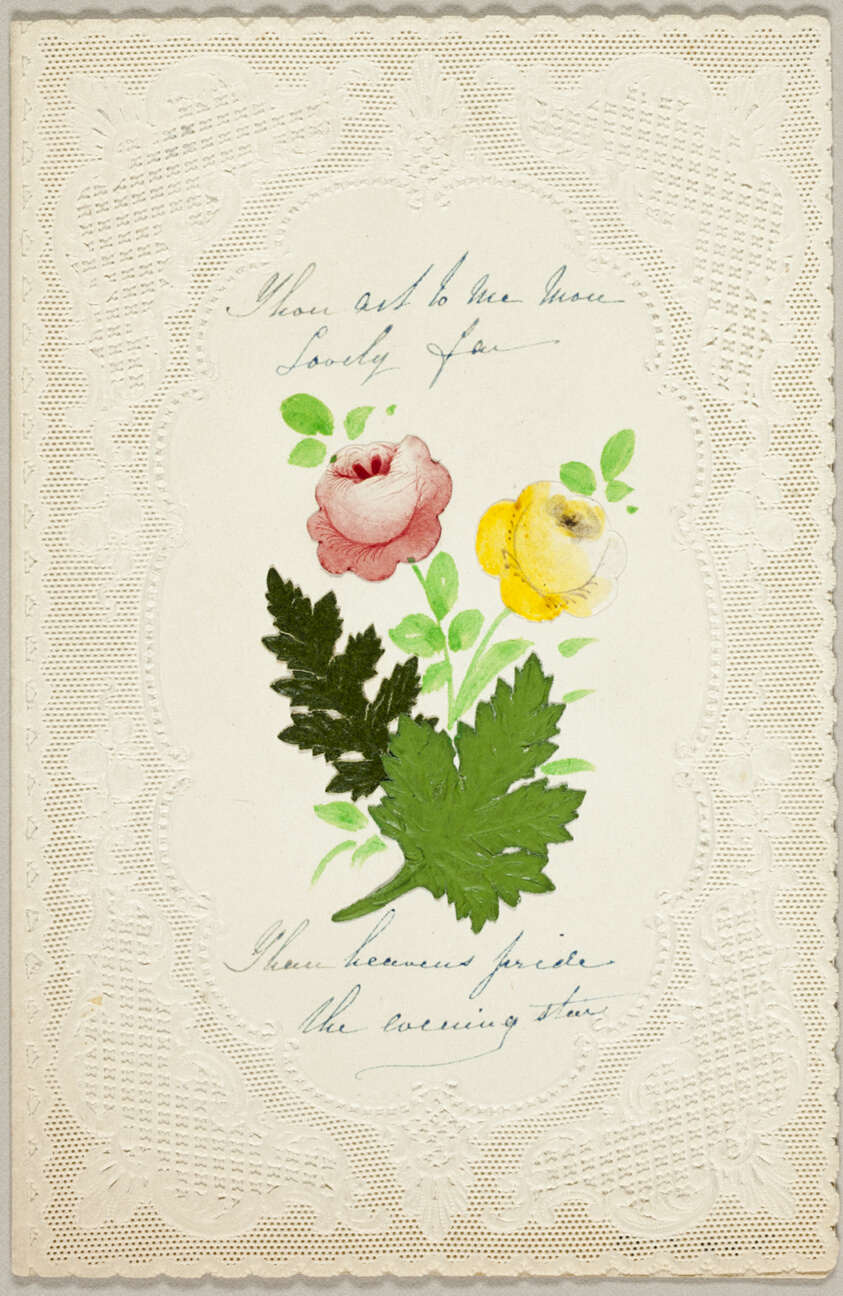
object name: Drawing and Watercolor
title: Thou Art to Me (valentine)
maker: George Meek (English, 19th century)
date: c. 1840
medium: Collaged elements with watercolor and pen and blue ink on cut and embossed ivory wove paper (lace)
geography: England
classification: valentine; prints and drawing; paper